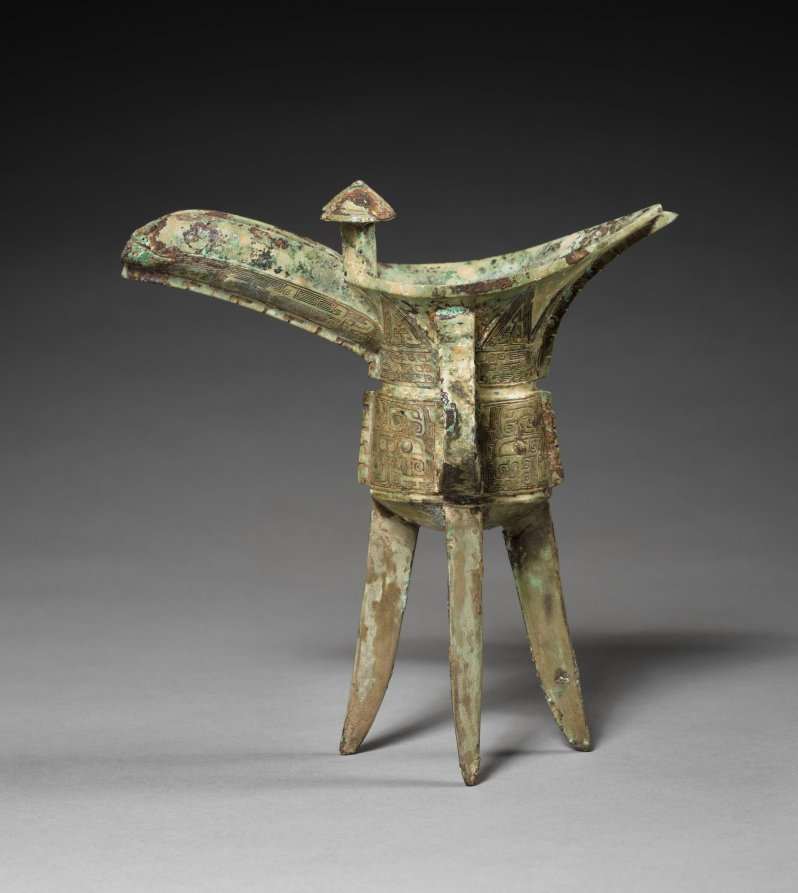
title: Wine Cups (Jue)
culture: China, Shang dynasty (c. 1600–c. 1046 BCE), Anyang phase (c. 1250–1046 BCE)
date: c. 1200 BCE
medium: bronze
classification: Metalwork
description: Wine and food played a major role in ritual offerings to the ancestral spirits and the Supreme Ancestor (Shangdi) performed by the Shang rulers in the state cult of ancestor worship. A variety of wine vessels—each type given a specific name—was cast to bear witness to the power and artistic vitality of this remote civilization. This example of a jue wine cup is for libations. Other major types of wine vessels include jia (wine warming vessel), fangyou (square wine container), and gu (beaker with a trumpeted mouth for pouring).